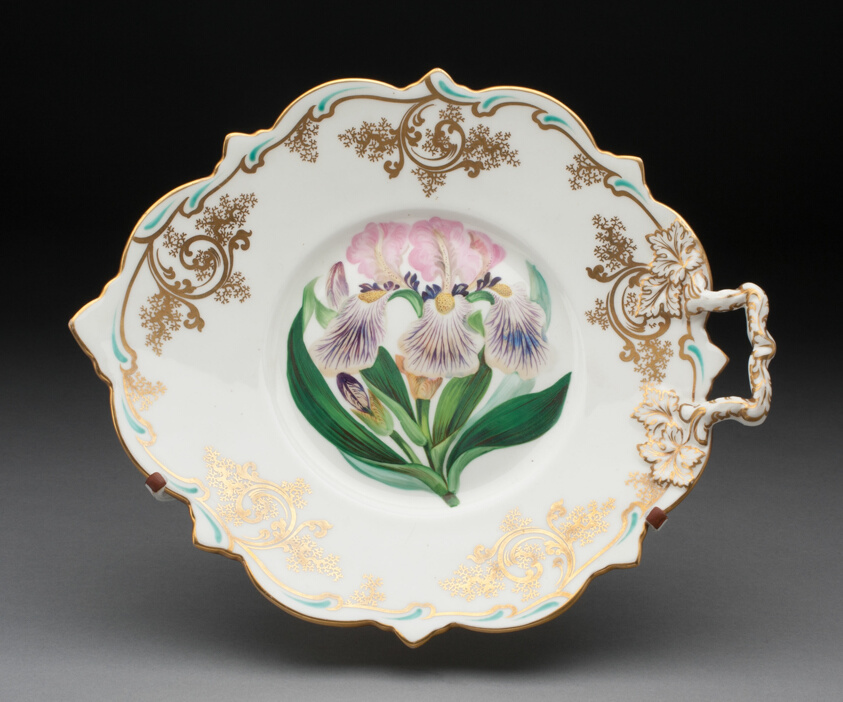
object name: Ceramics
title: Dish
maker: Spode Pottery & Porcelain Factory; English, founded 1776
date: c. 1825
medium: Porcelain, polychrome enamels and gilding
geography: Stoke on Trent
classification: dish (vessel); ceramics; porcelain; european decorative arts